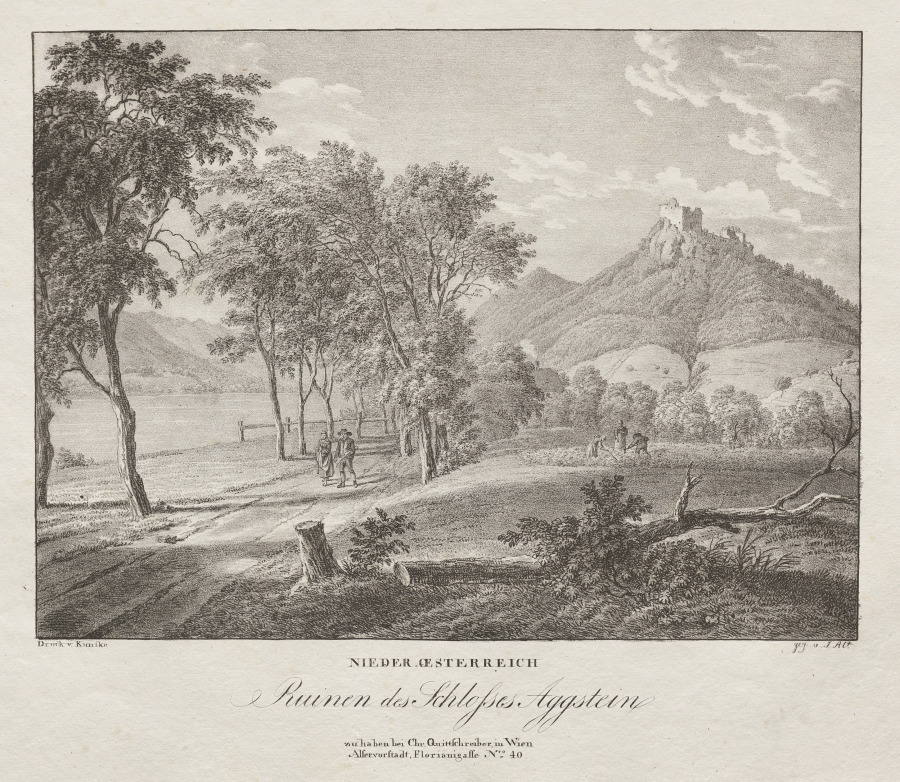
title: Nieder-oesterreich, Ruinen des Schlosses Aggenstein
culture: Austria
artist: Jakob Alt (Austrian, 1789–1872)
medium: lithograph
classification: Print